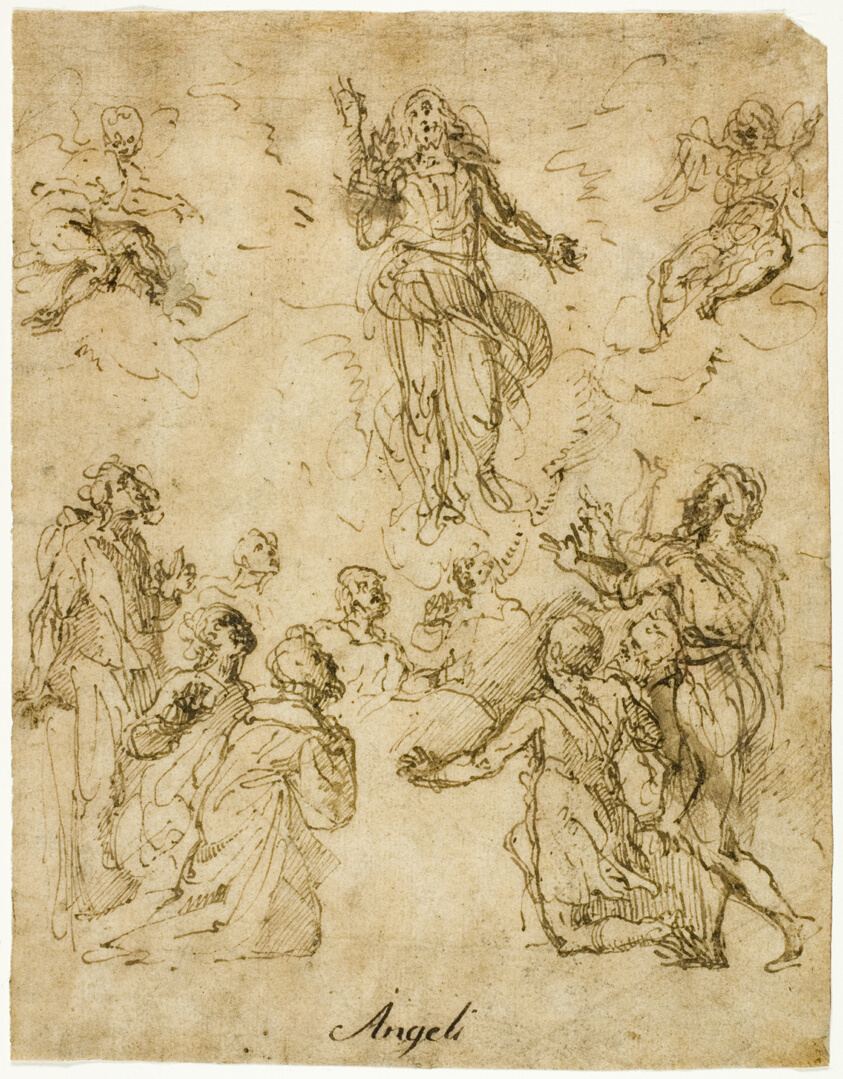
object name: Drawing and Watercolor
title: Ascension of Christ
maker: Giulio Cesare Angeli (Italian, 1570-1630)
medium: Pen and brown ink on tan laid paper, laid down on ivory laid paper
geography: Perugia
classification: pen and ink drawings; drawings (visual works); prints and drawing